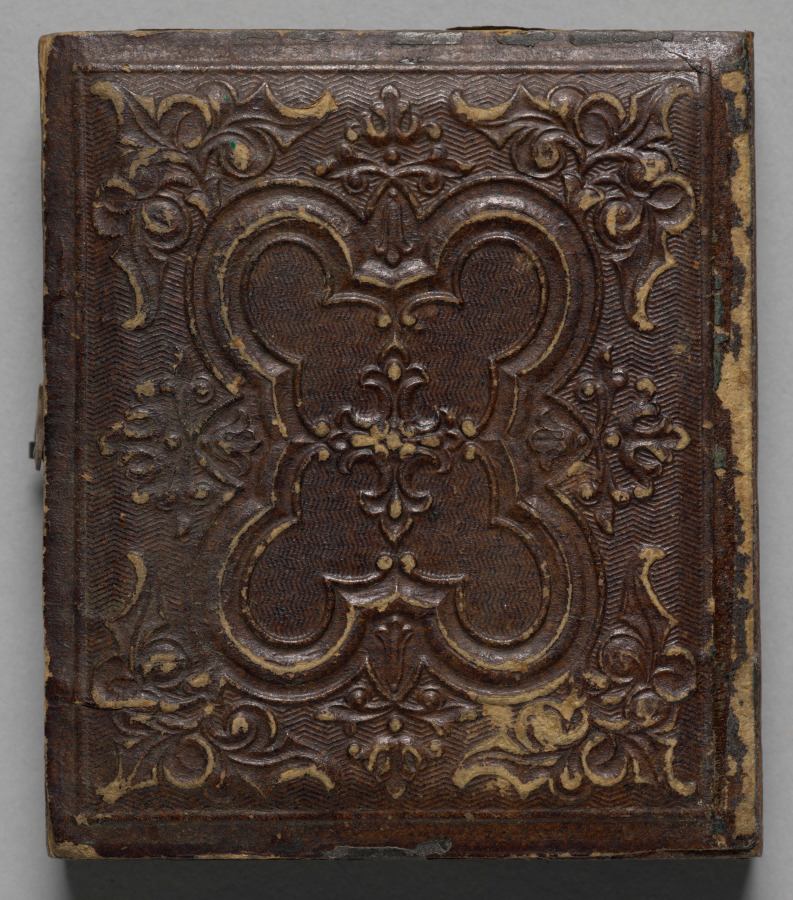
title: Child in off-shoulder polka dot dress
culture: America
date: c. 1860–65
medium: ambrotype, sixth plate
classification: Photograph